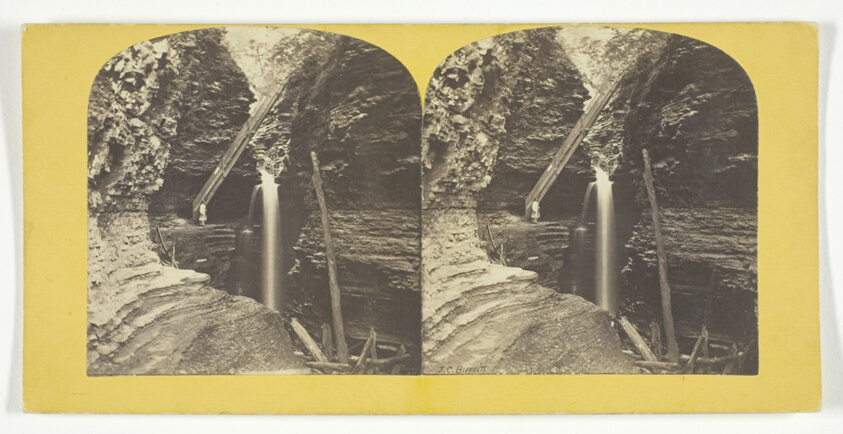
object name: Photograph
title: Freef Glen at Watkins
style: 19th century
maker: J. C. Burritt; American, active 1860s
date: 1860/65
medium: Albumen print, stereo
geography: Ithaca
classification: photography; photograph; albumen silver print; stereograph (albumen)